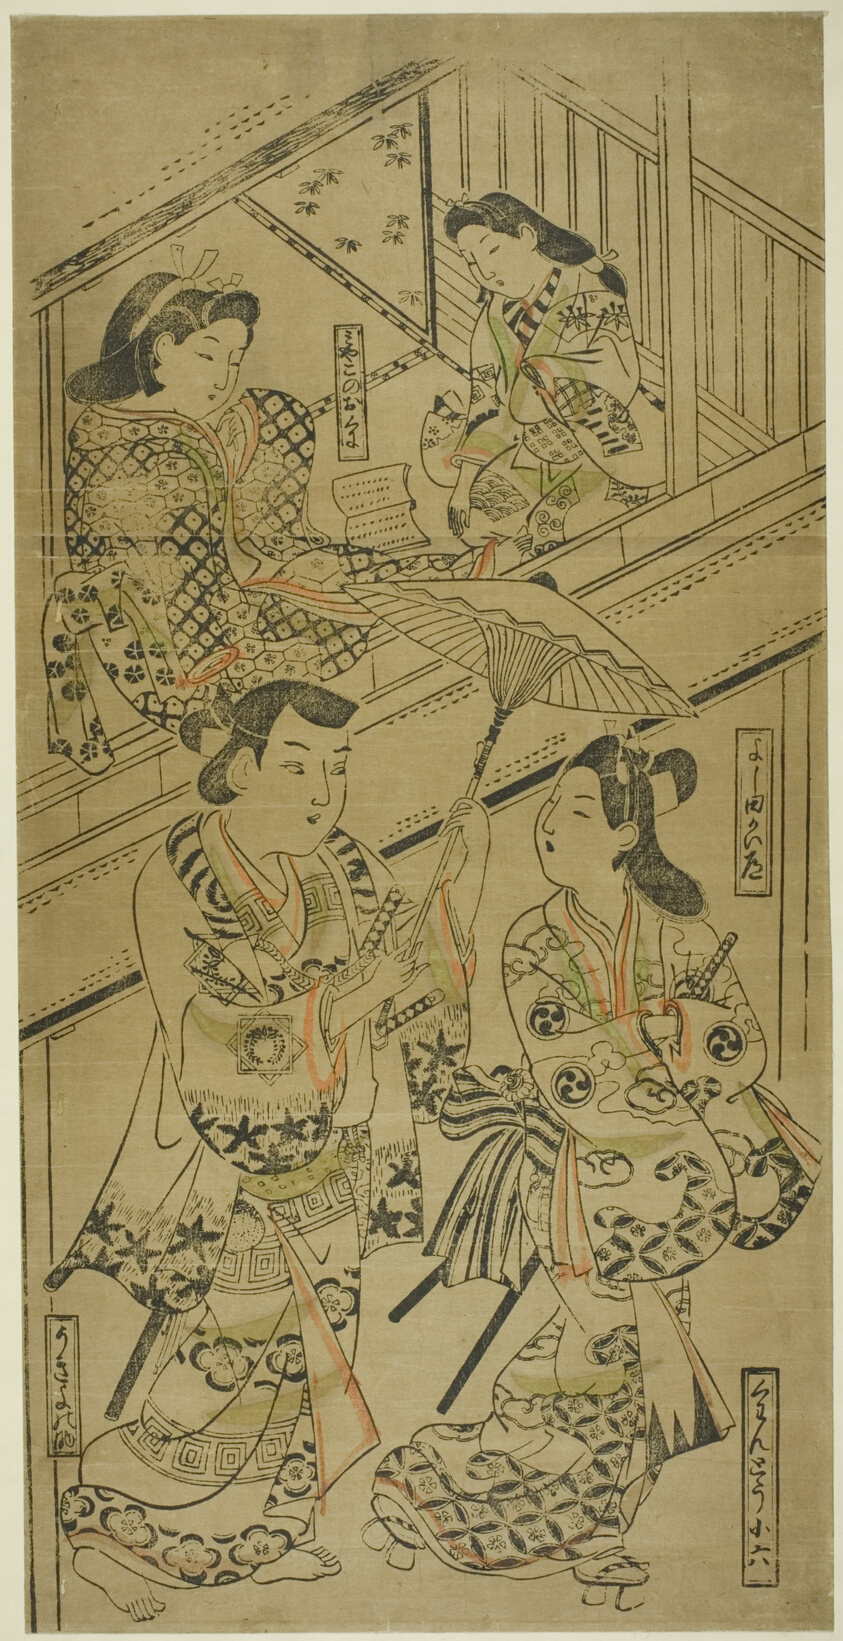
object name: Print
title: On the Yoshida Highway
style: Japanese (culture or style)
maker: Attributed to Sugimura Jihei; Japanese, active c. 1681–98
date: c. 1685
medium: Hand-colored woodblock print; tan-e, vertical o-oban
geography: Japan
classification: woodblock print; print; asian art